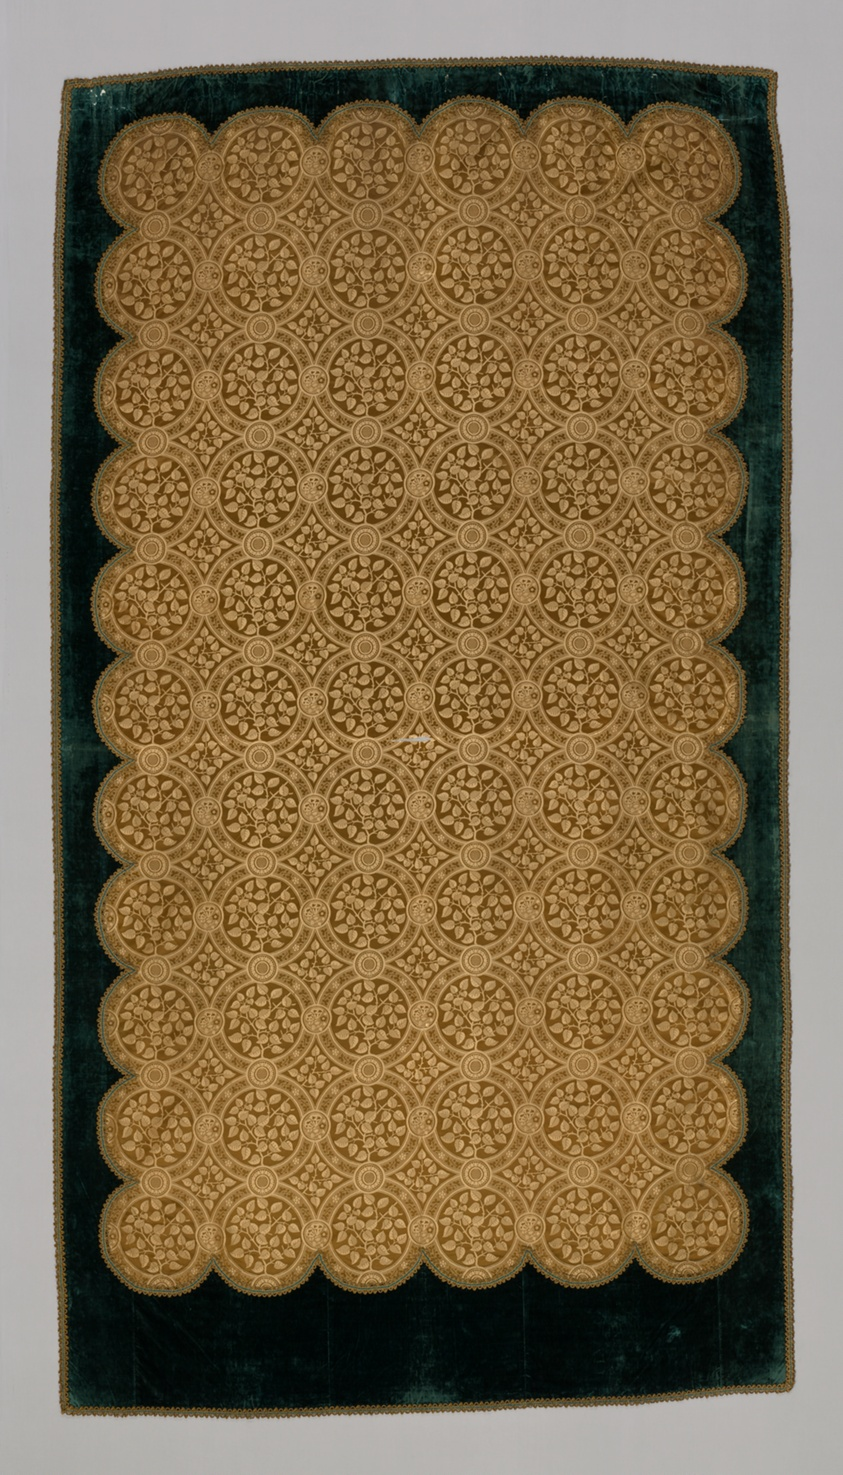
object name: Textile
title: Large Syringa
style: Aesthetic Movement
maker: Designed by Edward William Godwin (English, 1833–1886); Produced by Warner & Sons Ltd.; England, London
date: c. 1874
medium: Silk, satin weave, self-patterned by reversing of faces; edged with cotton and silk, plain weave with supplementary pile warps forming cut solid velvet; and silk and cotton, braid of plain weave with extended weft loops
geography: London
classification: textile; weaving; weaving - velvet